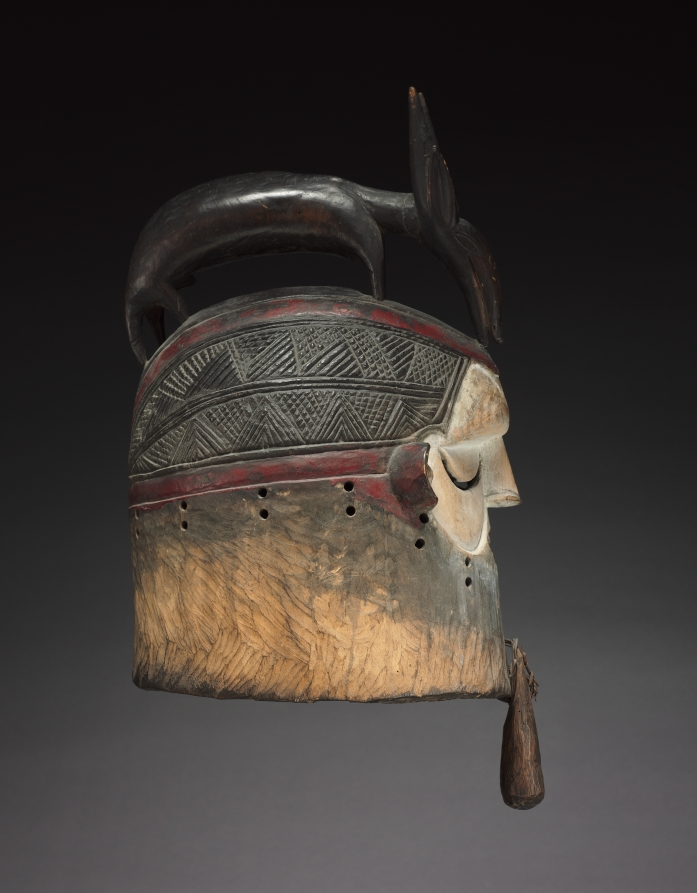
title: Mask (hemba)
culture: Africa, Central Africa, Democratic Republic of Congo, Suku-style carver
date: late 1800s–early 1900s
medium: Wood, reed, paint, and metal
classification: Mask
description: Suku helmet masks are often used in initiation ceremonies for young men in the society. Helmet masks such as this represent images of deceased elders in the society. They are to ensure successful hunting, help cure illnesses, and protect its wearer from evil. The animal shaped like a gazelle or antelope is typically associated with folktales, proverbs, and personal hunting exploits.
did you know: Suku helmet masks are often used in initiation ceremonies for young men in the society.